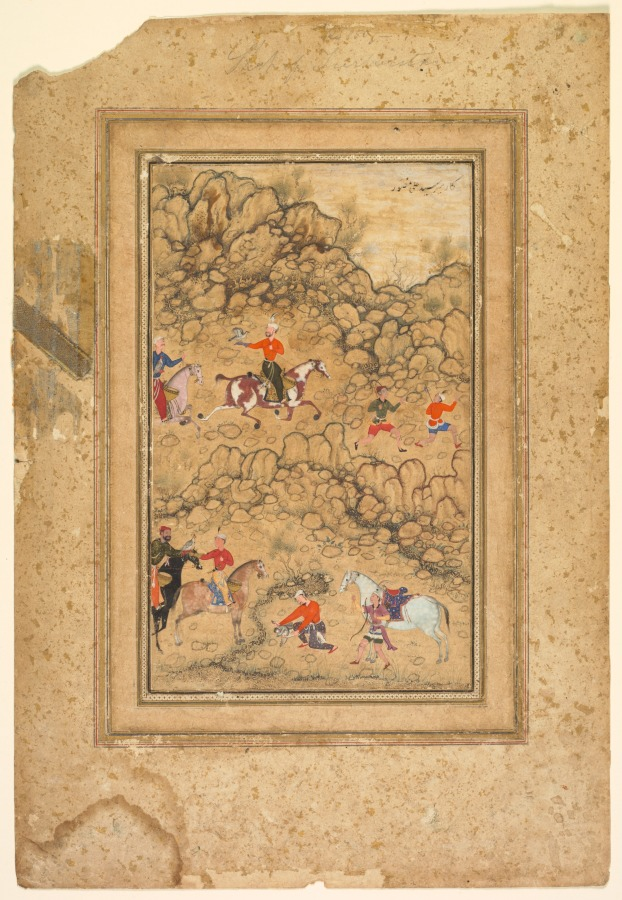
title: Hunting with falcons in a landscape (recto)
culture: Mughal India, court of Akbar (reigned 1556–1605)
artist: attributed to Abd al-Samad (Persian, c. 1510–1600)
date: c. 1558–60; borders added probably 1700s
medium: Gum tempera, ink, and gold on paper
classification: Painting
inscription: Inscription in upper right in nasta‘liq script, probably during the 1700s: the work of Mir Sayyid Ali, the illustrator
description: Mughal princes hunted on horseback with falcons. The hunting party would ride out into the wild and flush the prey from the brush. Then, its hood removed, the falcon would chase the prey and bring it down. This important work is thought to have been painted by one of the Persian artists Akbar’s father brought to India from Iran shortly after his arrival in India. The delicacy of the diminutive figures and the gently modeled rocks of the arid landscape contrast to the boldly dynamic paintings made by Indian artists.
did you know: The hunter’s glove is on the ground, as he pulls his falcon off the duck.